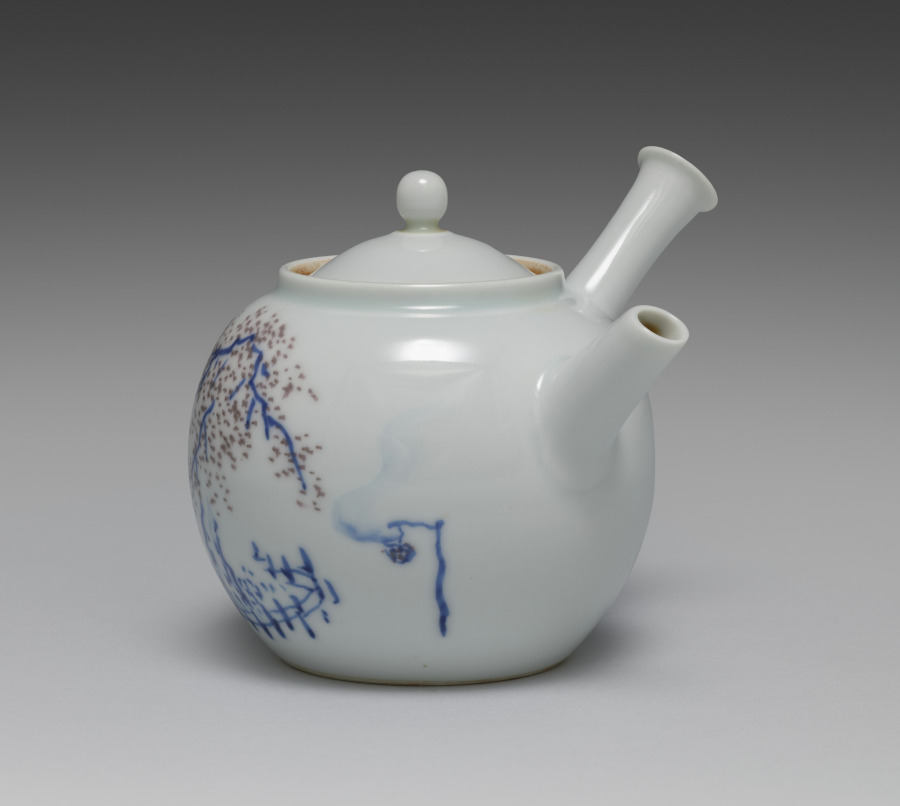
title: Teapot with Cherry at Night in Gion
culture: Japan, Meiji period (1868–1912)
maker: Seifū Yohei III (Japanese, 1851–1914)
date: 1893–1914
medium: Porcelain with underglaze blue and iron oxide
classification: Ceramic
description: This side-handled sencha teapot with the cherry tree has a nearly spherical shape, and its recessed lid has an ovoid knob. It has both blue and a purplish brown under the glaze for the blossoms and embers on one side, and the vertical calligraphy identifies the tree as a cherry tree at night in the Gion area of Kyoto. To the right of the tree, smoke billows from a small lantern fire in a basket suspended on a post. In terms of collecting history, a paper inserted into the box of Teapot with Cherry at Night in Gion is of interest. It is a flyer for Yamamoto Shōseidō, a shop (no longer extant) that sold fine Kyoto ceramics in Osaka.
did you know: This teapot features the Japanese theme of a blossoming cherry tree in the Gion area of Kyoto in underglaze blue and brown.